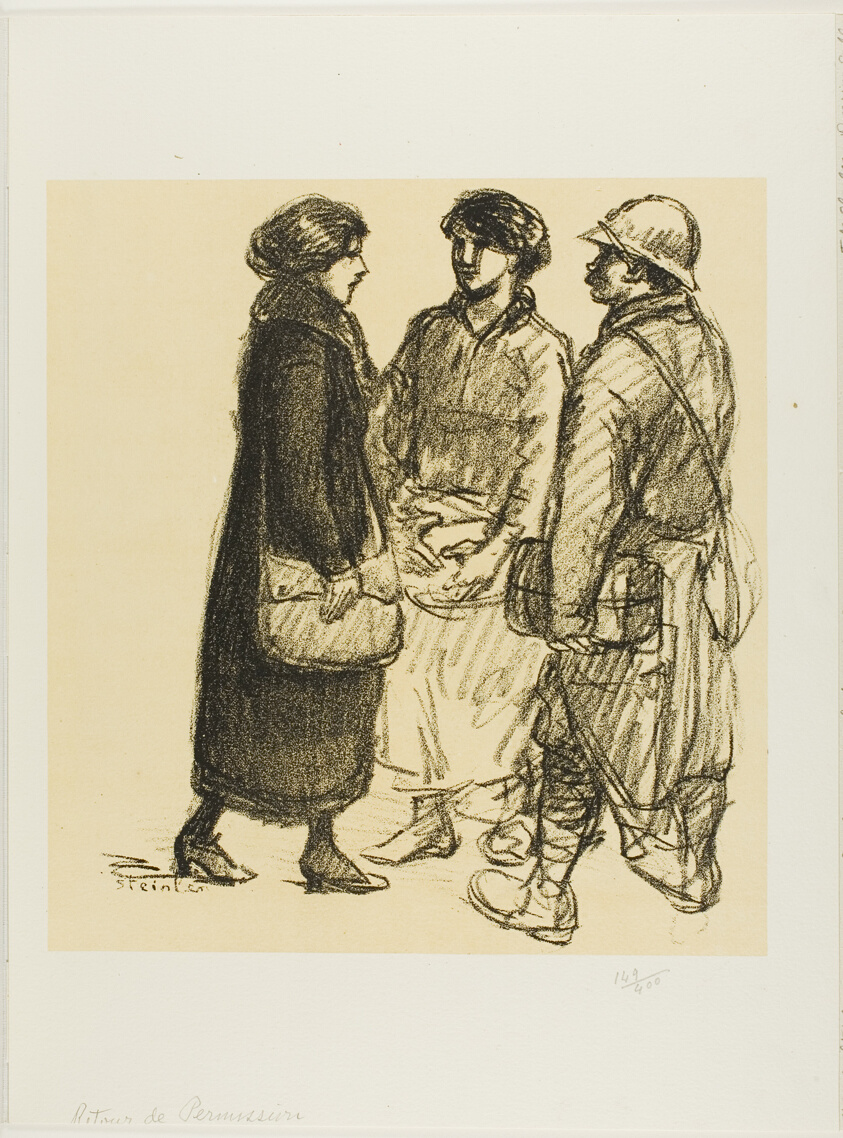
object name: Print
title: On Leave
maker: Théophile-Alexandre Steinlen; French, born Switzerland, 1859-1923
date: 1915/17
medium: Lithograph in black with a fawn tint on thick off-white wove paper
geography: France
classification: lithograph; print; prints and drawing